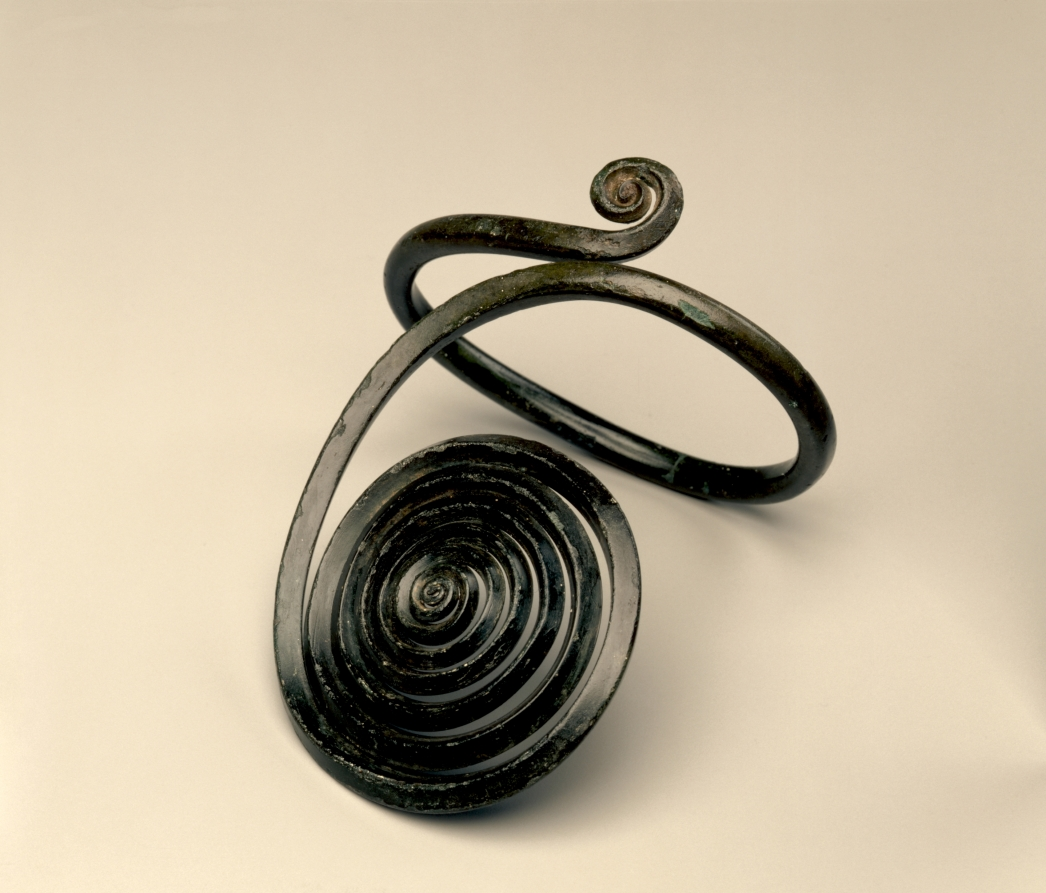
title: Spiral Armilla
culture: Central Europe, Bronze Age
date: c. 1500 BCE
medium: bronze, wrought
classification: Metalwork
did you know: This armilla or arm ornament has a ridge along the spine, ending in a large spiral at one end.